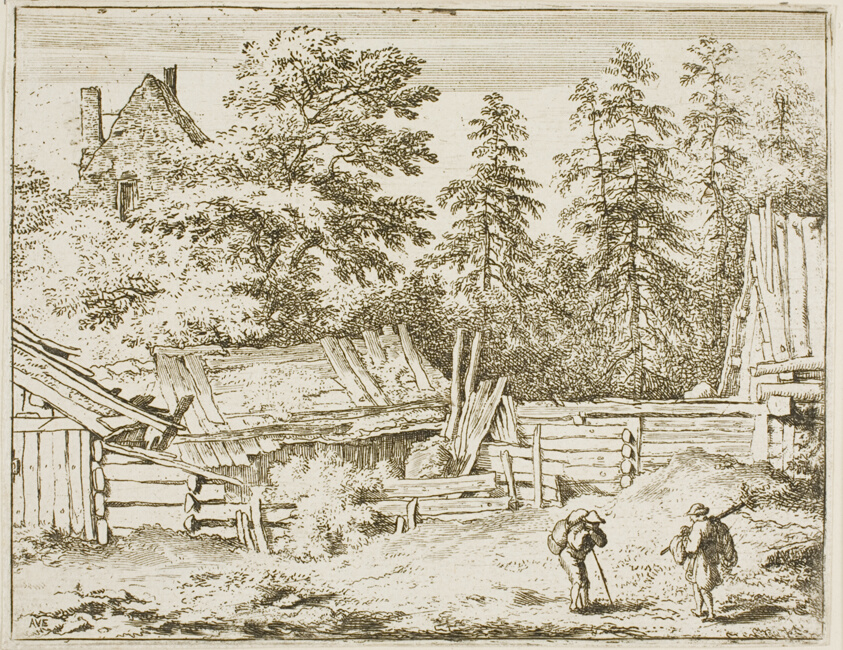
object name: Print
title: Huts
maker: Allart van Everdingen; Dutch, 1621-1675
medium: Etching on paper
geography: Holland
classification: etching; print; prints and drawing